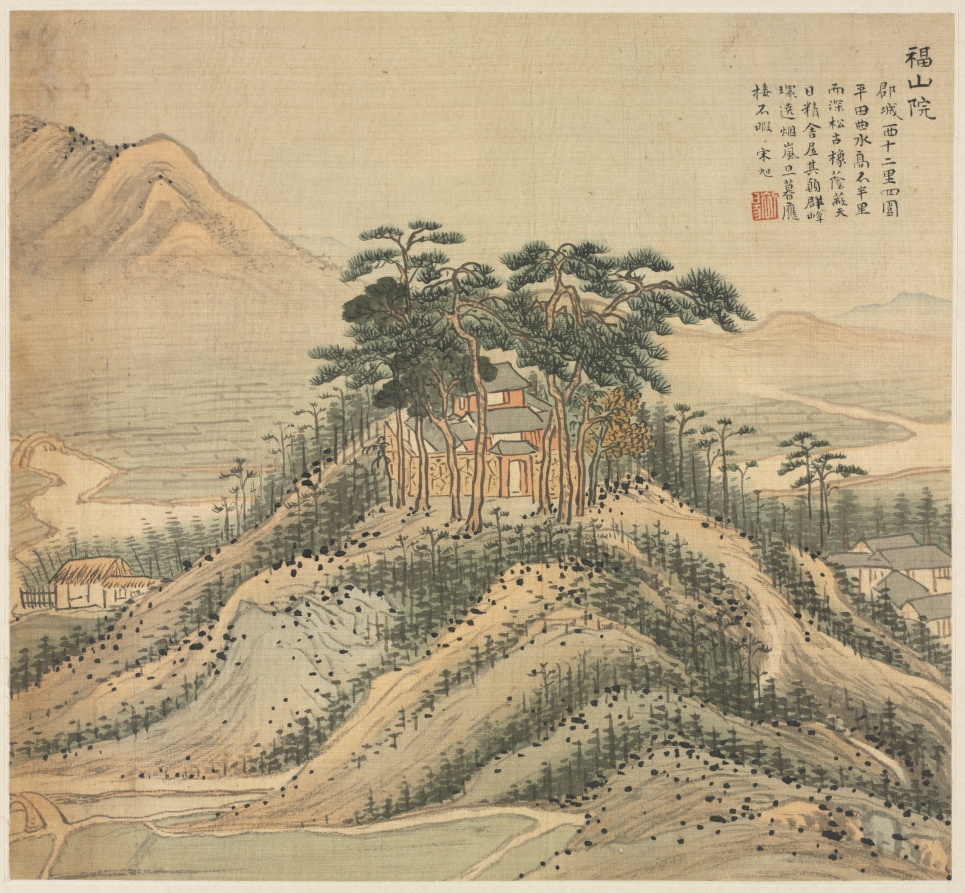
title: Fushan Monastery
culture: China, Jiaxing, Ming dynasty (1368–1644)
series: Eighteen Views of Huzhou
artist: Song Xu (Chinese, 1525-c. 1606)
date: c. 1588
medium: Album leaf; ink and color on silk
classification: Painting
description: By the 1500s, visits to historic and scenic sites in the lower Yangzi delta stimulated an increase of printed illustrated travel books. Topographical depictions of local scenery flourished. Leaves from this album illustrates sites around Lake Tai of the two adjacent counties Changxing and Wuxing (modern Huzhou). Song Xu, who lived intermittently in Jiaxing and Songjiang, must have passed through Wuxing by boat and thus knew the region. The paintings are inscribed with gazetteerlike notations, suggesting that the album was produced for clients as commemorative works, a travel guide, or for “armchair travel” (woyou) in one’s mind.